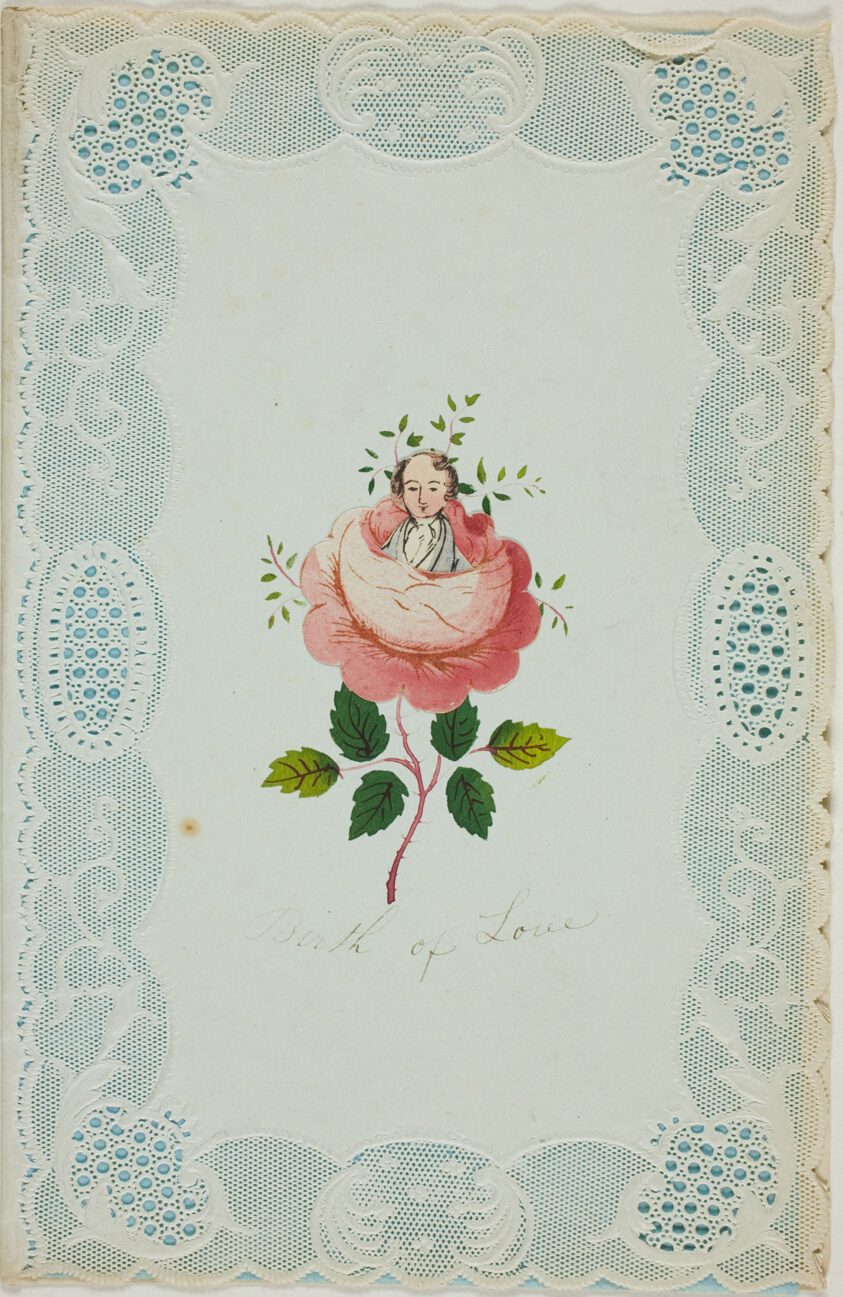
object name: Drawing and Watercolor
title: Birth of Love (Valentine)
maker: Unknown Artist; English, 19th century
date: c. 1850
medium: Watercolor and collaged elements, with pen and black ink on cut and embossed ivory wove paper (lace, folded), with blue wove paper insert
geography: England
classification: valentine; prints and drawing; paper